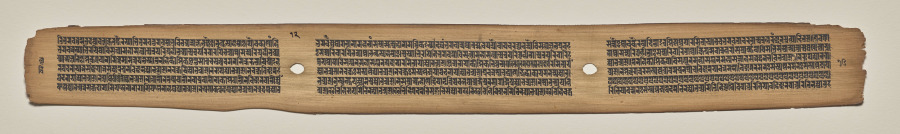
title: Text, Folio 12 (verso), from a Manuscript of the Perfection of Wisdom in Eight Thousand Lines (Ashtasahasrika Prajnaparamita-sutra)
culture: Eastern India, Bihar, Vikramashila Monastery. Painting: Nepal, Kathmandu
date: Sunday, September 14, 1119 (year 239 of the Newar Samvat in the month of Ashvina)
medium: gum tempera and ink on palm leaves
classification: Painting